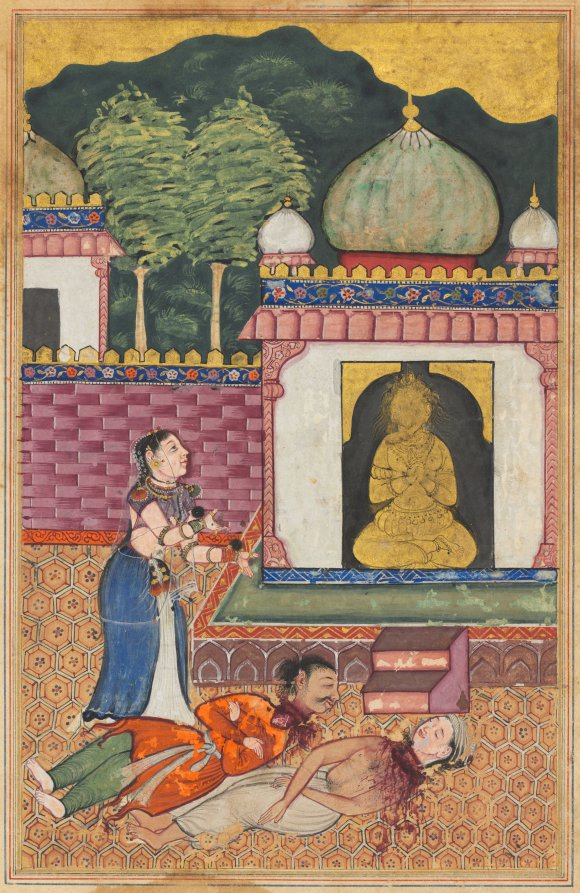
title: The princess discovers the dead bodies, with heads severed, of her husband and his Brahman friend, from a Tuti-nama (Tales of a Parrot): Thirty-fourth Night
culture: Mughal India, court of Akbar (reigned 1556–1605)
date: c. 1560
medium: gum tempera, ink, and gold on paper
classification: Painting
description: The frantic princess stands above the bodies of her husband, dressed in orange, and the Brahman. Both men have died by their own hand. They are miraculously resurrected after the princess places each head on the wrong body. Because of this mix-up, the men begin to fight over who should be considered the princess’s rightful husband.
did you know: A flag, which is a standard component of an active Hindu temple, was drawn for the tallest dome, but never painted.